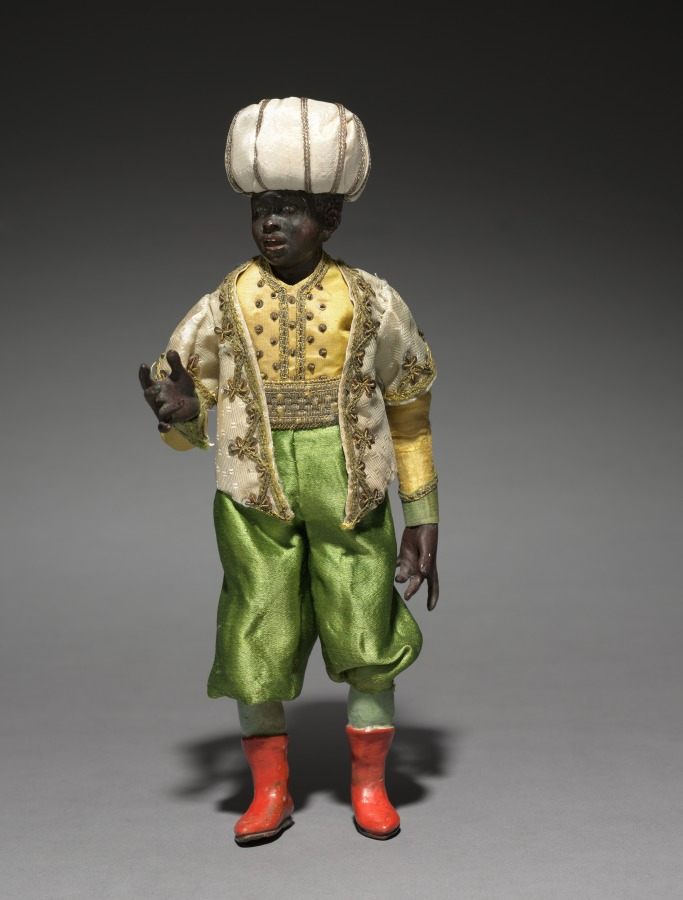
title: Figure from a Crèche: Attendant of the Magi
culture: Italy, Naples, late 18th-early 19th century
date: 1780–1830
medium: painted wood and terracotta with various textiles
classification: Sculpture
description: The practice of creating scenes of the Nativity for the home dates from the early 1700s in Italy, where people began to set up doll-like figures of about a foot or less in height. The custom was particularly popular in Naples around 1800, where crèche scenes (crèche means cradle, or crib) included many figures, whose heads and hands of painted terracotta, stuffed cloth bodies, and clothing adapted from contemporary local costumes gave them an amazingly realistic character. Representations of the birth of Jesus can be traced to the first few centuries of Christianity. Both living creatures and sculptural depictions of them were used from early times. By the late middle ages it was customary to create life-size figures of wood or stone, naturalistically painted, to represent the characters who participated in the events of Jesus's early life. These sculptures were then arranged in scenes illustrating one or both of the most important of these events, the Adoration of the Shepherds and the Adoration of the Magi-the three kings from the East who came to pay homage to the Christ child. Used in churches, these large figures were especially popular in Italy, Central Europe, Spain, and Portugal.